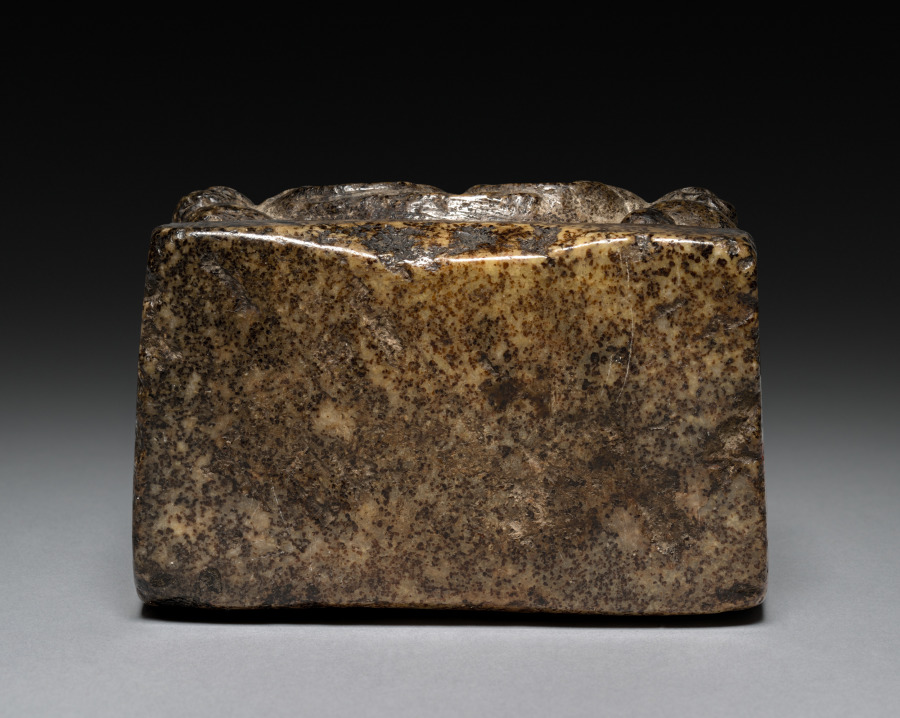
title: Buddha Triad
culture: China, Northern Dynasties period (386–581 CE), Northern Zhou (557-581)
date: 568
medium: stone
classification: Sculpture